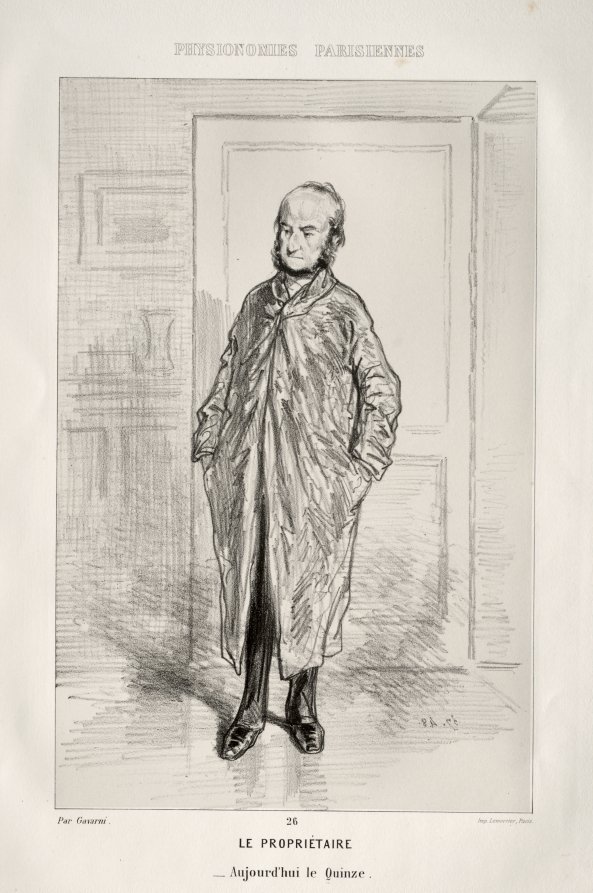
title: Le Propriétaire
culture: France, 19th century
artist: Paul Gavarni (French, 1804–1866)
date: c. 1857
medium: lithograph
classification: Print